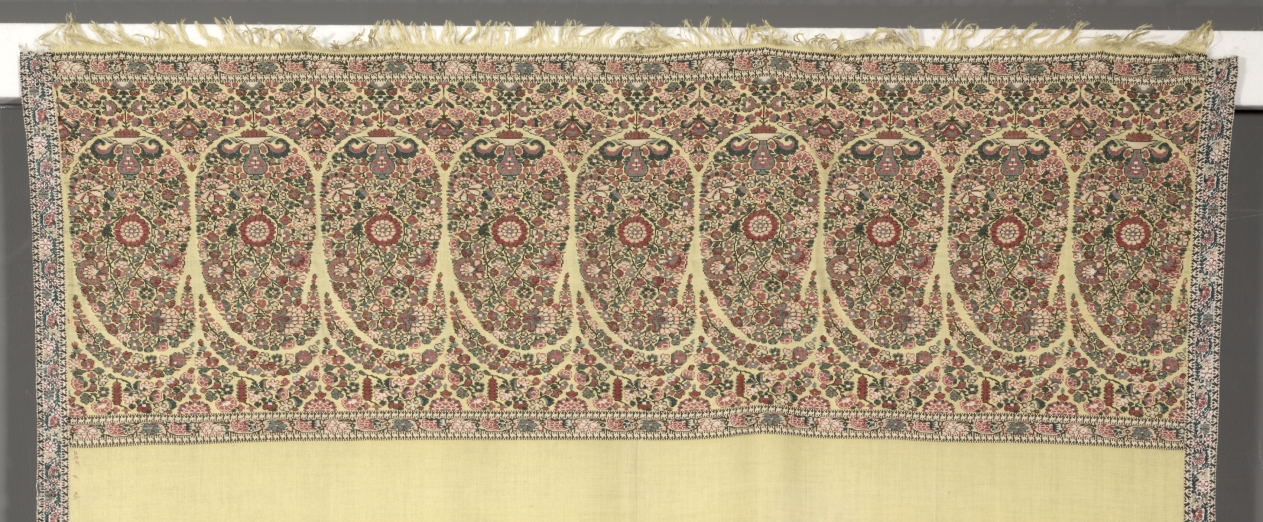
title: Long Shawl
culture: France?, 19th century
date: before 1815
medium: 2/2 twill weave ground with supplementary weft pattern in 3/1 (Z) weave twill; silk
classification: Textile